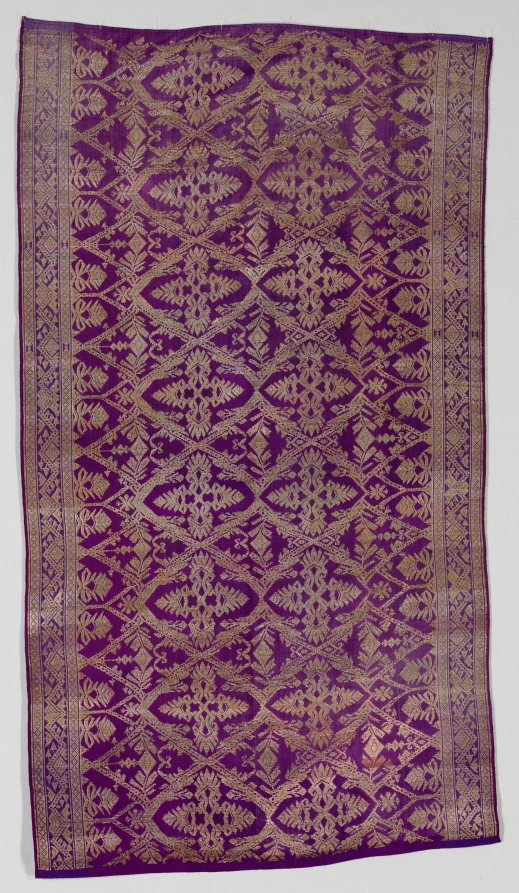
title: Brocade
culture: Indonesia, Bali, late 19th century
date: late 1800s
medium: brocade, silk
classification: Textile